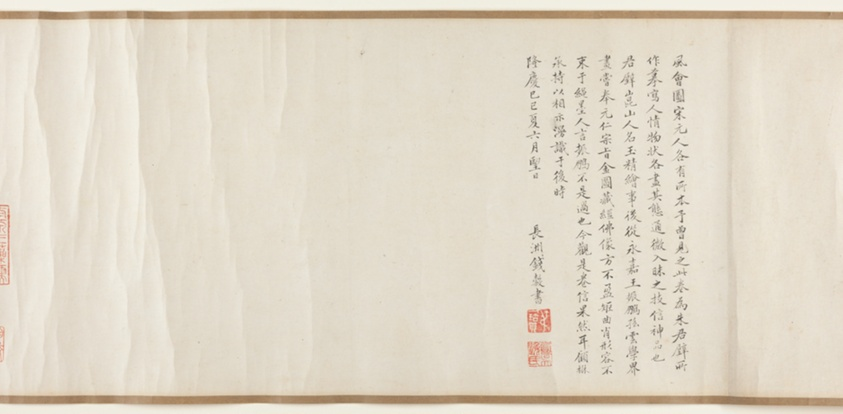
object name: Painting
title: Street Scenes in Times of Peace 太平風會圖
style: Chinese (culture or style)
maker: Zhu Yu (Zhu Junbi) 朱玉（朱君璧）; Chinese, 1293-1365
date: Yuan dynasty (1279–1368), 14th century 元朝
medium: Handscroll; ink and colors on paper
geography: China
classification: handscroll; painting; asian art